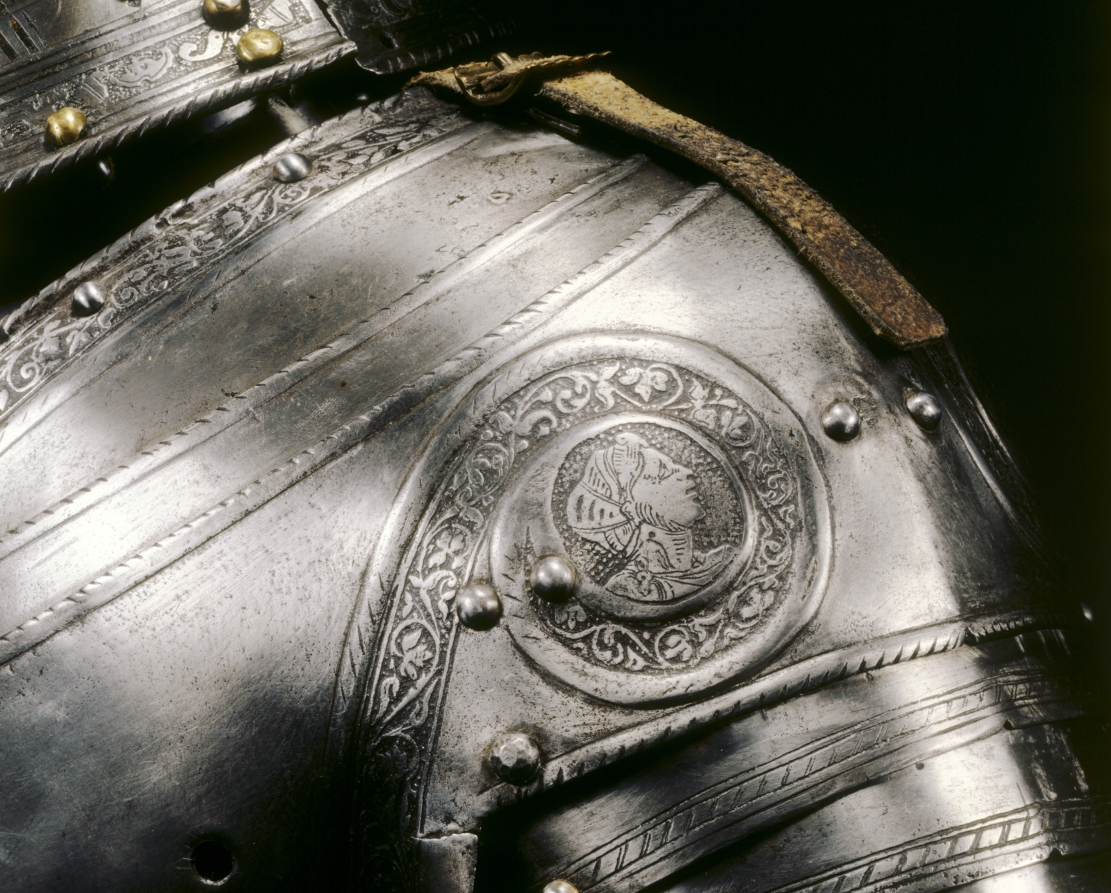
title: Half-Suit of Armor for the Field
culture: North Italy, Brescia (?), 16th century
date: c. 1575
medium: steel with etched decorative bands and roundels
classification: Arms and Armor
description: Decoration was critical to fine armor, and etching was the most commonly used technique. Here, the bands along the borders are etched. On the breastplate, pauldrons (shoulder guards), and tassets (hip and upper leg guards), etched medallions enclose profile busts reminiscent of ancient Roman portraits. The lance rest on the breastplate indicates that this half-suit was once part of a complete field armor for man and horse. The etching technique used for armor was developed in the late 1400s. The metal surface was first coated with an acid-resistant substance, such as wax or varnish. An etching needle was then used to scratch a design into the surface. The exposed areas were then treated with an acid that would "bite" or etch the lines into the metal. When the coating was removed, the etched design was blackened for contrast.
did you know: This is an example of raised field etching where the design stands out in slight relief from the background.